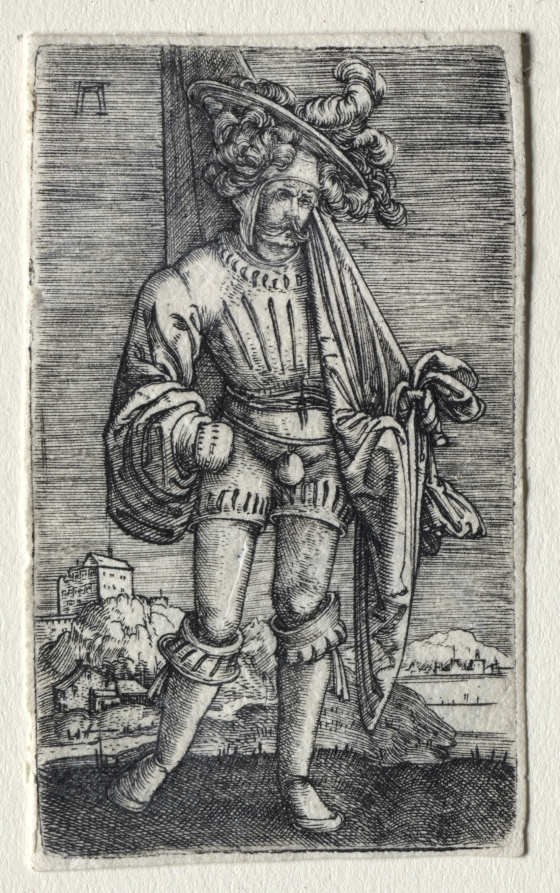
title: The Little Standard Bearer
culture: Germany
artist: Albrecht Altdorfer (German, c. 1480–1538)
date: c. 1506–38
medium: engraving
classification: Print